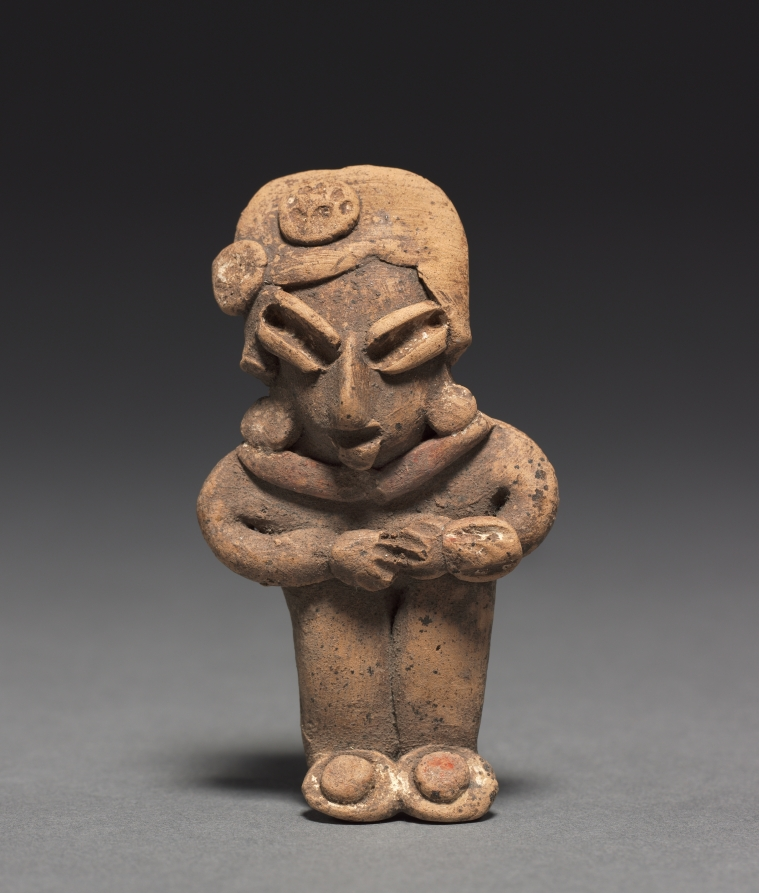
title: Male Figurine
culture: Mesoamerica, Mexico, Guanajuato, Chupícuaro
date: c. 400–100 BCE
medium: earthenware with pigments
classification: Sculpture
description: The Chupícuaro culture, located north of Mexico City in the state of Guanajuato, created a distinctive ceramic tradition including small clay figurines. This example is said to belong to a group of ten figurines from the same burial or cache (1990.145–154). The group includes both males and females that can be sorted into couples based on size.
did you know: Groups of figurines were sometimes arranged in scenes and likely used in household rituals.